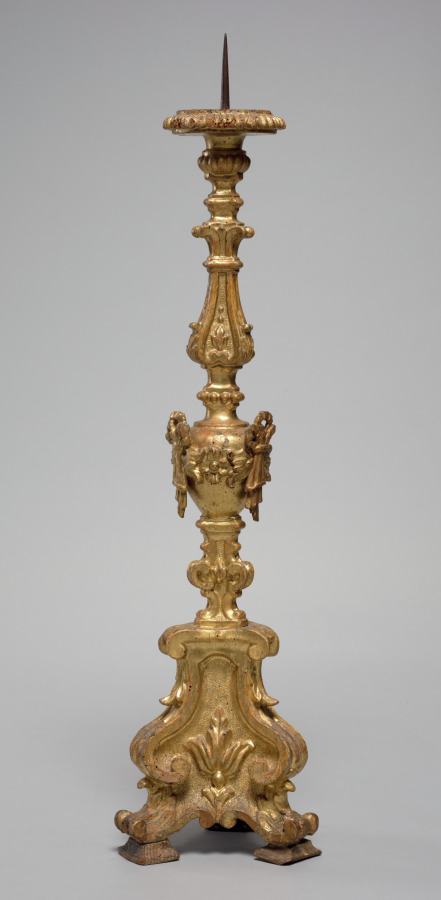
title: Candleholder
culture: Italy, mid-late 17th century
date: mid-late 1600s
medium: gilded wood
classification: Furniture and woodwork